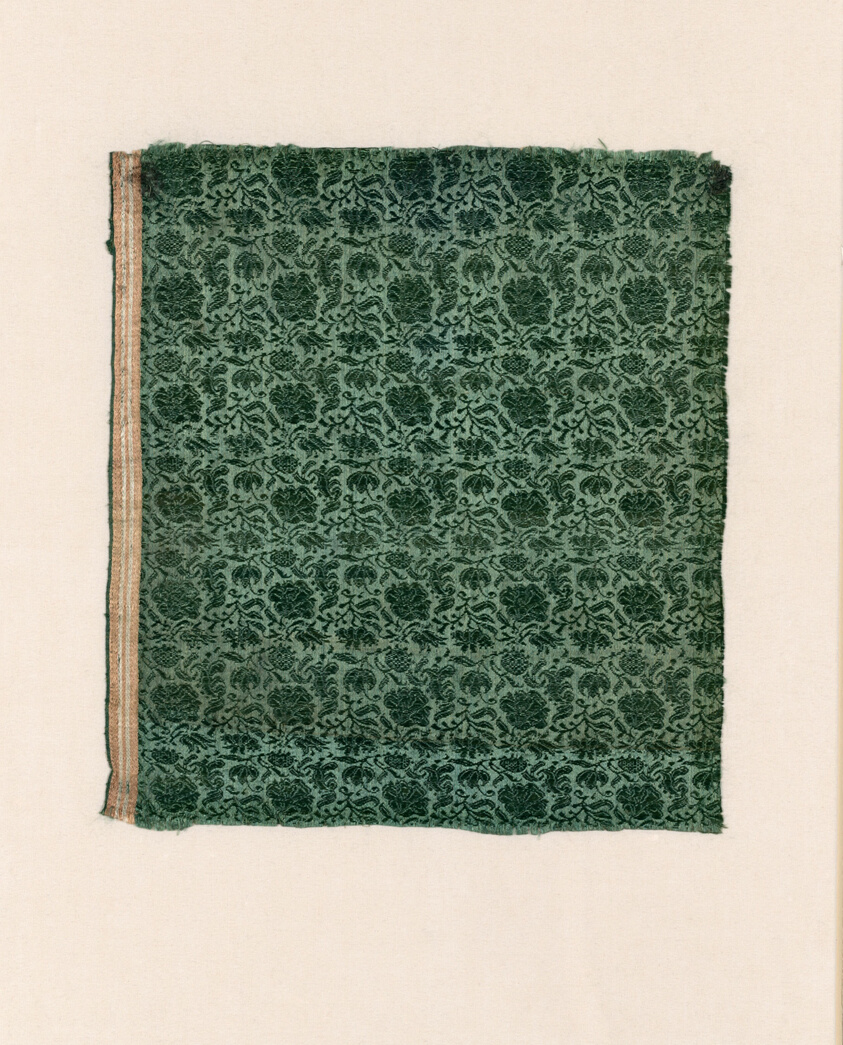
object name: Textile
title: Fragment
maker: Italy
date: 1601/25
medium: Plain compound satin ground.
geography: Italy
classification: textile; weaving